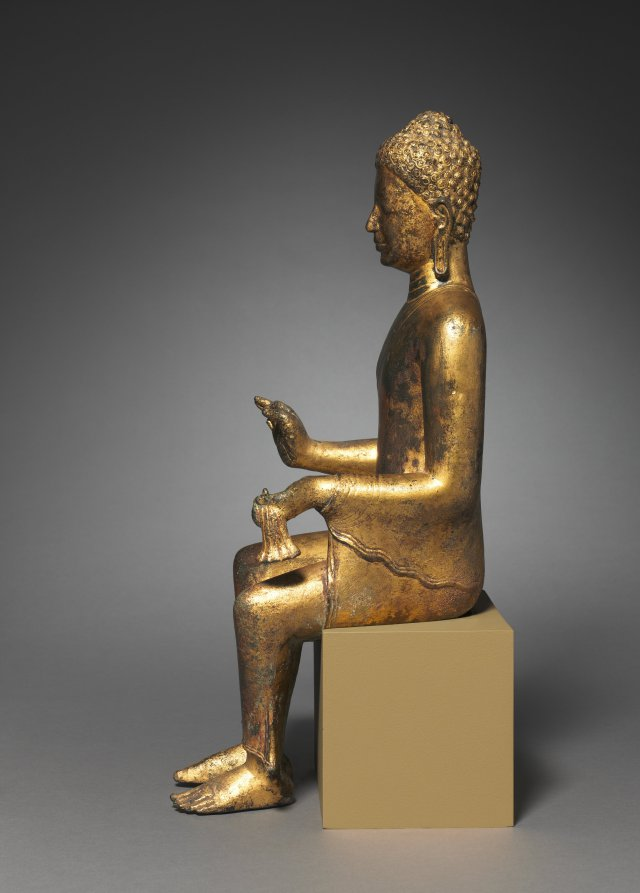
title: Enthroned Buddha Preaching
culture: Myanmar or Thailand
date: 700s–800s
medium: copper alloy with gilding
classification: Sculpture